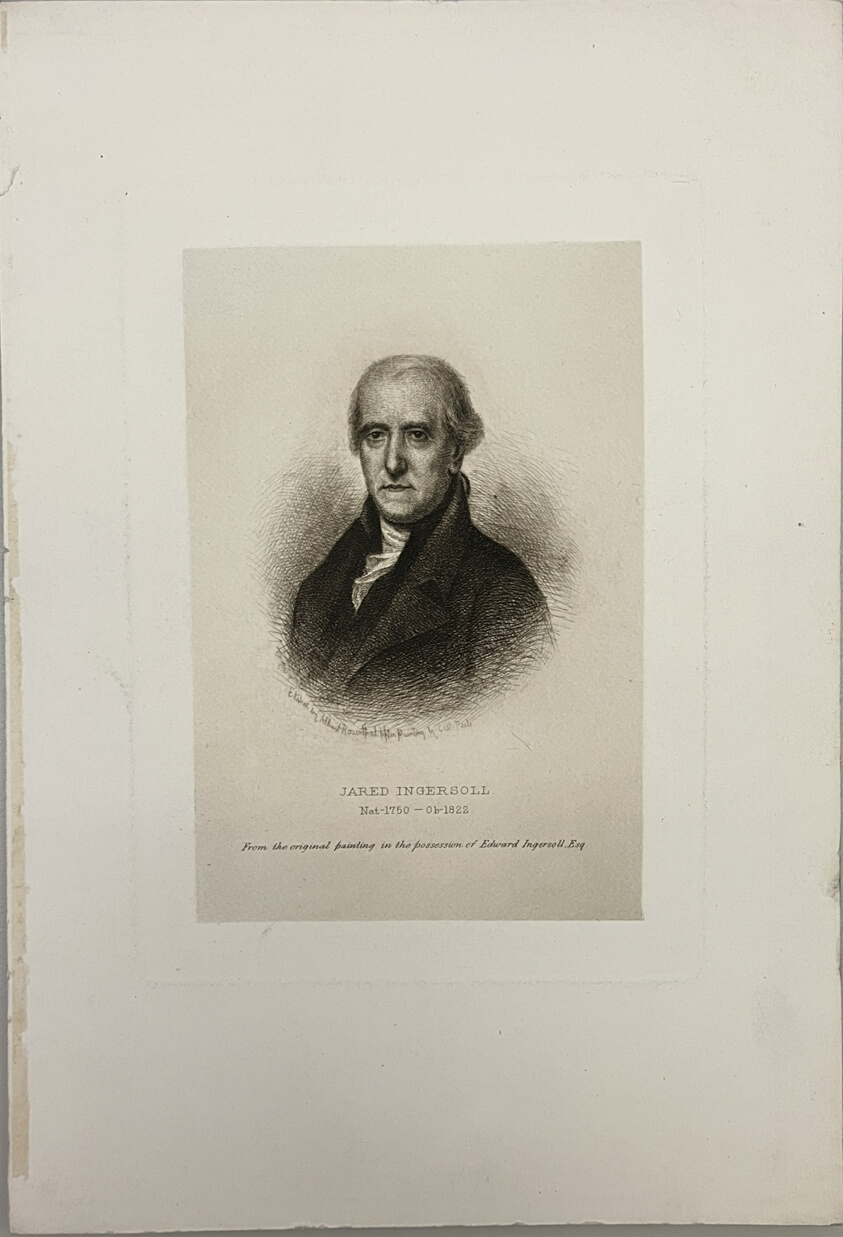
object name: Print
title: Jared Ingersoll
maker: Albert Rosenthal (American, 1863-1939); after Charles Wilson Peale (American, 1741-1827)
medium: Etching on paper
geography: United States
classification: reproduction; print; prints and drawing